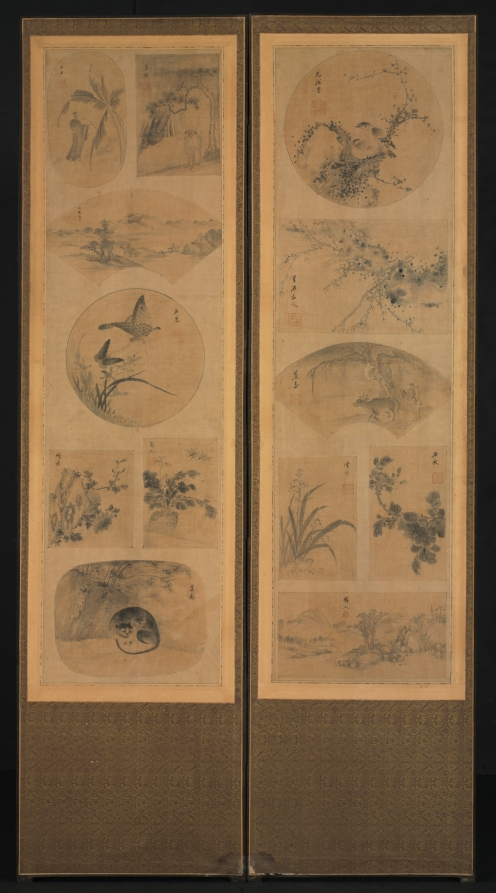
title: Painting of One Hundred Themes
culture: Korea, Joseon dynasty (1392–1910)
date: late 1800s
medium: Ten-panel folding screen affixed with album leaves (obverse), calligraphy (reverse), ink and color on silk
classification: Painting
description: The front of this screen features an assortment of subjects: birds and flowers, landscapes, and scenes of everyday life, mostly in monochromatic ink with light colors. The screen’s reverse side conveys a number of classical poems about the fleeting beauty of the four seasons. Traditionally, only one side of a folding screen bears painted or embroidered images, since these were used as a background furnishing. In Korean houses by the 1800s and early 1900s, however, two-sided folding screens became noticeably popular, possibly inspired by Japanese double-sided folding screens, which mainly served as room dividers in Japanese households.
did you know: The way of displaying small images of various subjects became one of the most popular type of painting toward the end of the 19th century.